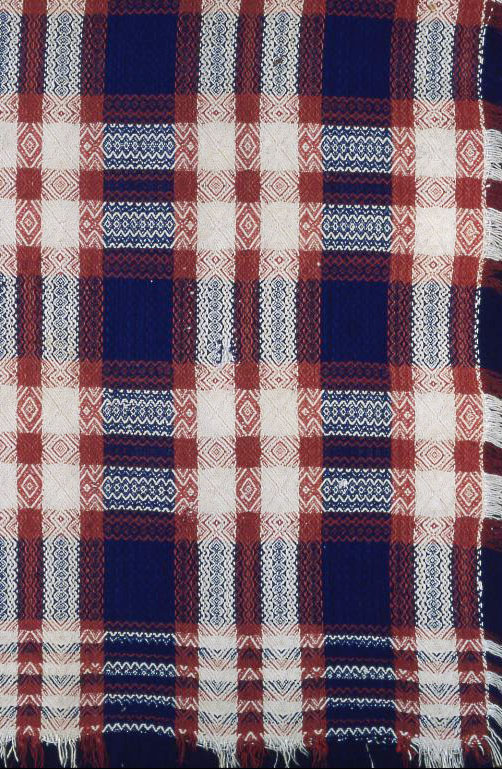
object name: Textile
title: Coverlet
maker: United States, Ohio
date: 1840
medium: Cotton and wool, point twill weave (multiple shaft); warp and weft fringe; two loom widths joined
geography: Ohio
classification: textile; coverlet; weaving - coverlet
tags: coverlet